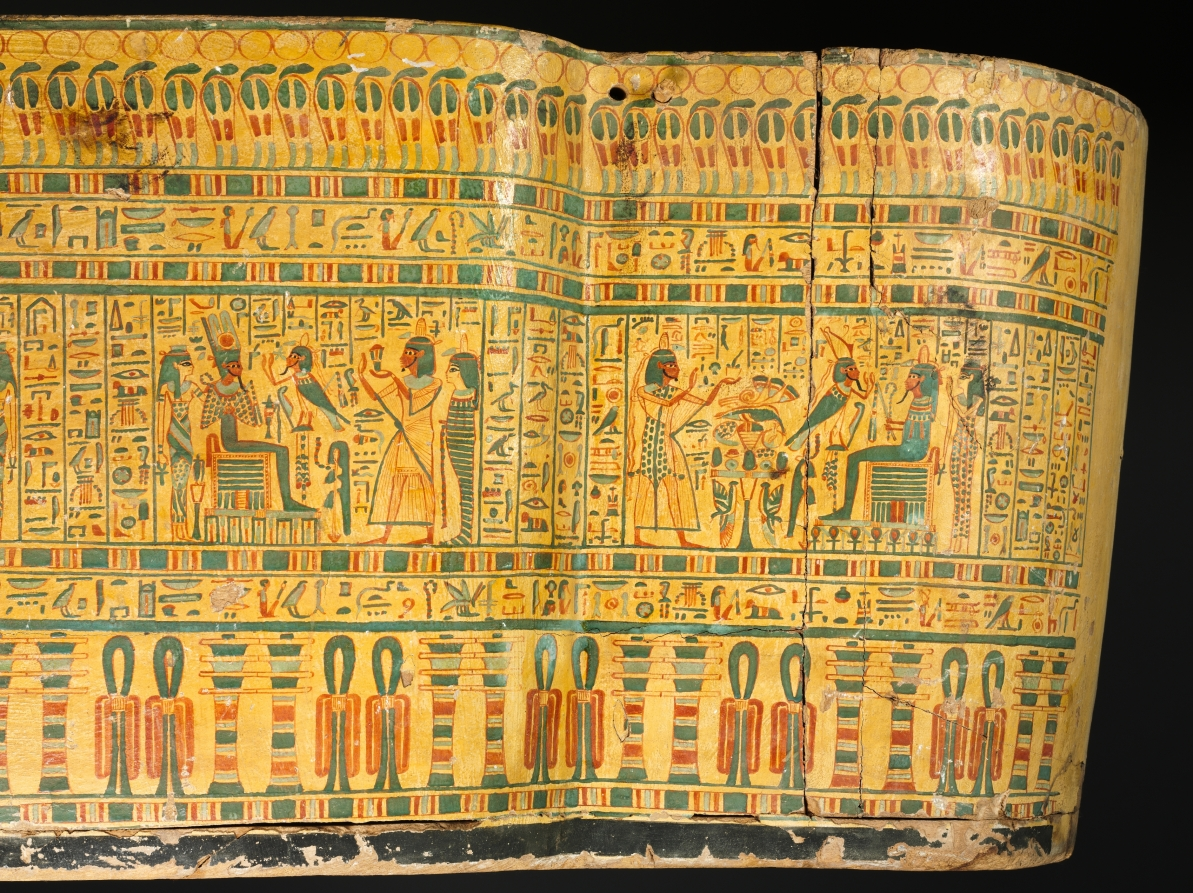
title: Coffin of Bakenmut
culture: Egypt, Thebes, Third Intermediate (1069–715 BCE), Dynasties 21–22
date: c. 1000–900 BCE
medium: gessoed and painted sycamore fig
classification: Funerary Equipment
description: The coffin of Bakenmut is one of the finest examples of painted wooden coffins made for the priests of Amen and their families at Thebes during Dynasty 21 and early Dynasty 22. The pharaohs of this time were no longer buried in the Valley of the Kings, but instead built tombs in the Delta, far to the north, where they resided. Security was lax in the Theban necropolis. The coffins and funerary goods of the wealthy citizens of Thebes were placed in unmarked and undecorated family tombs cut into the cliffs on the west bank of the Nile. All the care and detail that in more prosperous times were devoted to the decoration of the tomb chapel were now lavished on the elaborately painted coffins. Every available surface is crowded with religious scenes, images of funerary gods and goddesses, protective spells, and magical symbols. The deceased appears mummiform. An elaborate floral collar entirely covers the upper body, exposing only the separately attached hands (now lost). A pair of red "mummy braces" are crossed over the chest, their point of intersection marked by a winged sun disk. The lower body is covered with tiny figures modeled in gesso against a yellow background, which gives the effect of gold inlaid with glass or semiprecious stone. The decoration on the interior features two deified dead kings of Dynasty 18. Although these rulers had lived centuries before, memory of their greatness was still very much alive. The main scene near the top depicts Tuthmosis III, the great military pharaoh, who lived 500 years before Bakenmut. Posed as a mummy, the ruler wears a brilliant feathered garment enfolding him with falcon’s wings. The scene below features back-to-back seated images of Amenhotep I, regarded as the patron of the Theban cemetery and worshiped as a local god there.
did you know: Originally another smaller coffin was placed inside this outer coffin and in that the deceased with a mummy board would have rested.